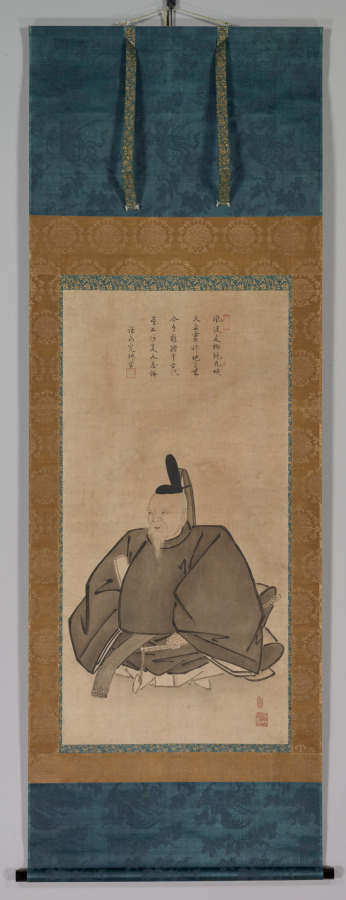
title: Portrait of Sugawara Michizane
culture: Japan, Muromachi period (1392–1573)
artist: Yōgetsu (Japanese, active late 1400s to early 1500s)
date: late 1400s–early 1500s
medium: hanging scroll; ink and color on paper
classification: Painting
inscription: four-line inscription signed "Sakugen Shūryō" (1501-1579) accompanied by two seals unread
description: Sugawara Michizane (845–903) was a Kyoto aristocrat who died in exile in Dazaifu in Japan’s southern island of Kyushu, having been slandered at court. His vengeful spirit was later pacified by the construction of shrines in his name. His image was incorporated into the repertoire of Zen Buddhist figure painting, which included bodhisattvas, Daoist immortals, and other enlightened beings. Eminent monk Sakugen Shūryō (1501–1579) inscribed this work, which was painted by monk-painter Yōgetsu of Kyushu, who traveled east to study either in Kyoto or Kamakura. The Chinese-style poem is an ode to Michizane in his guise as the deity Tenjin.